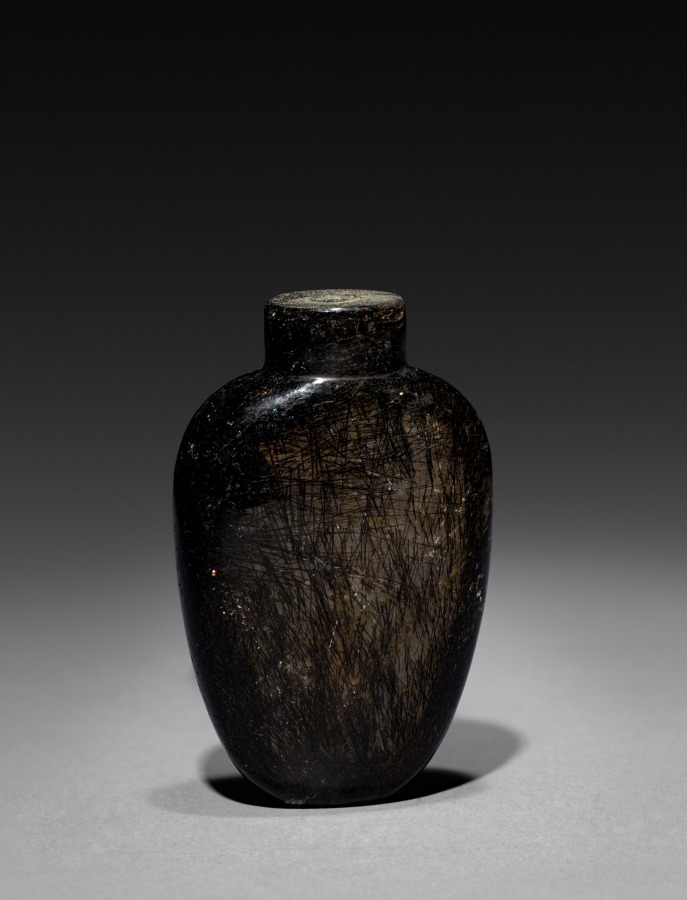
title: Snuff Bottle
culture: China, Qing dynasty (1644-1911)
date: 1644–1911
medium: glass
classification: Glass